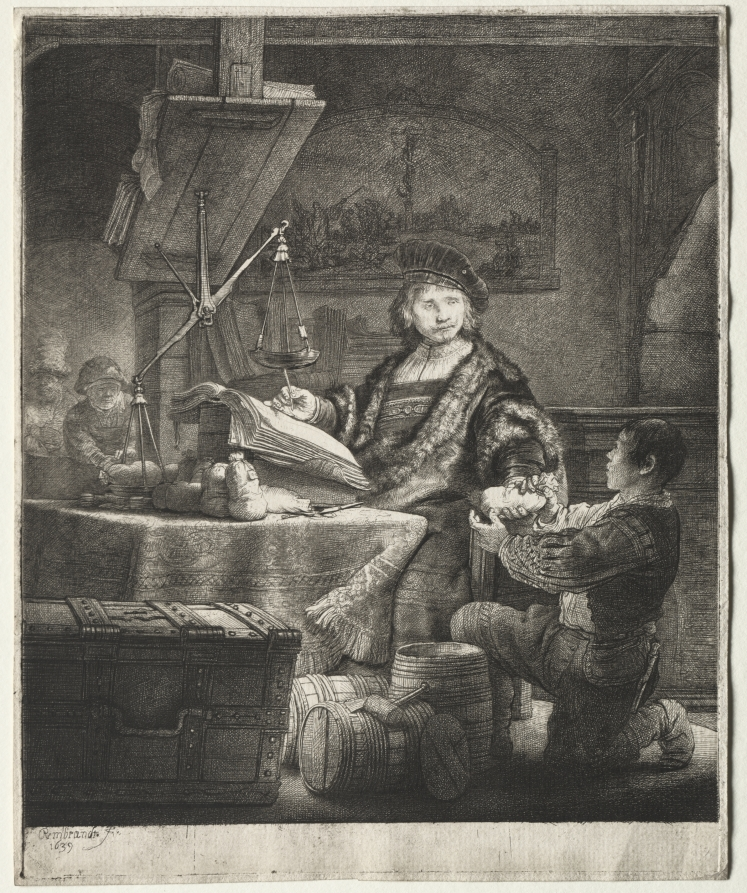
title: Jan Uytenbogaert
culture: Netherlands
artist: Rembrandt van Rijn (Dutch, 1606–1669)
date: 1639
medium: etching with drypoint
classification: Print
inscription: lower left, in plate: Rembrandt f. / 1639 ; VERSO, upper left, in graphite: B. 281 / second state / Ro[?] No. 7[5 ii/?] ; lower right, in graphite: II ; lower right, in graphite: II[partially erased]